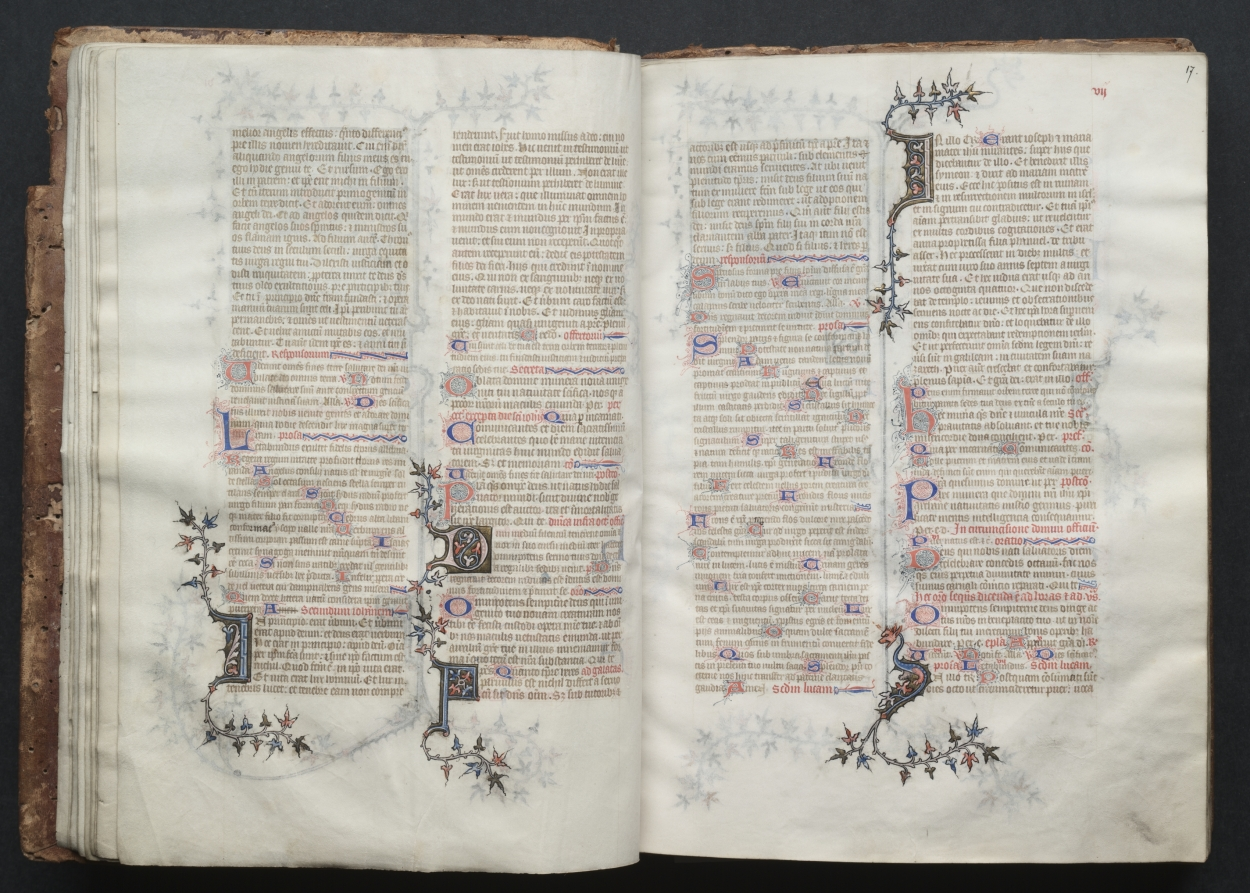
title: The Gotha Missal: Fol. 17r, Text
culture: France, Paris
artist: Master of the Boqueteaux (French)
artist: and Workshop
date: c. 1375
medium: ink, tempera, and gold on vellum; blind-tooled leather binding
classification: Bound Volume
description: The style and quality of this manuscript's decoration is typical of deluxe Parisian books made for aristocratic or royal patrons. Most of the book's decoration appears to be the work of the Master of the Boqueteaux, an artist active at the court of King Charles V (died 1380). His style was apparently shared by a number of book illuminators working in and around Paris. It is very possible that the Gotha Missal belonged to Charles V, but is not provable because the manuscript has no royal portraits and lacks a colophon. Given the book's magnificent decoration, however, it would seem that it was produced for a Valois prince, if not for the king himself. The manuscript receives its name from the German dukes of Gotha, its later owners.